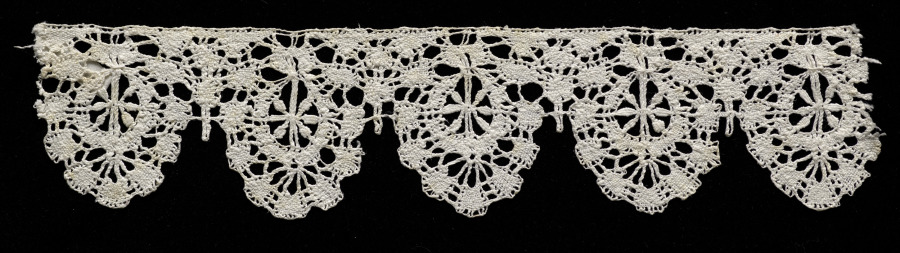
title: Lace Edging of Points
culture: Italy, Genoa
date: 1600s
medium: Bobbin lace (rose lace)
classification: Lace